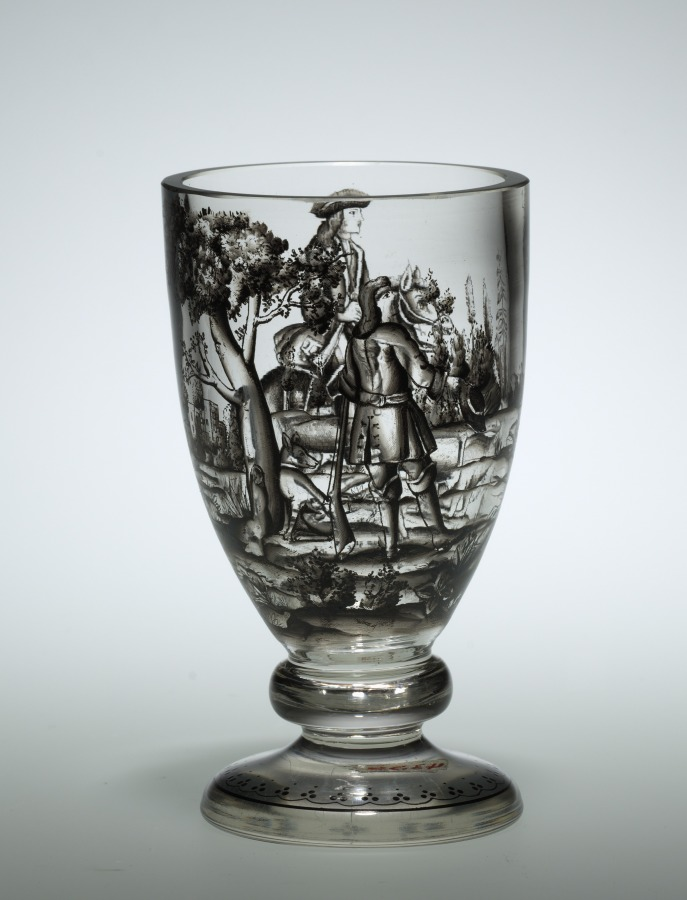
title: Glass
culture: Germany, 18th century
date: c. 1730–1750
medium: glass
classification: Glass